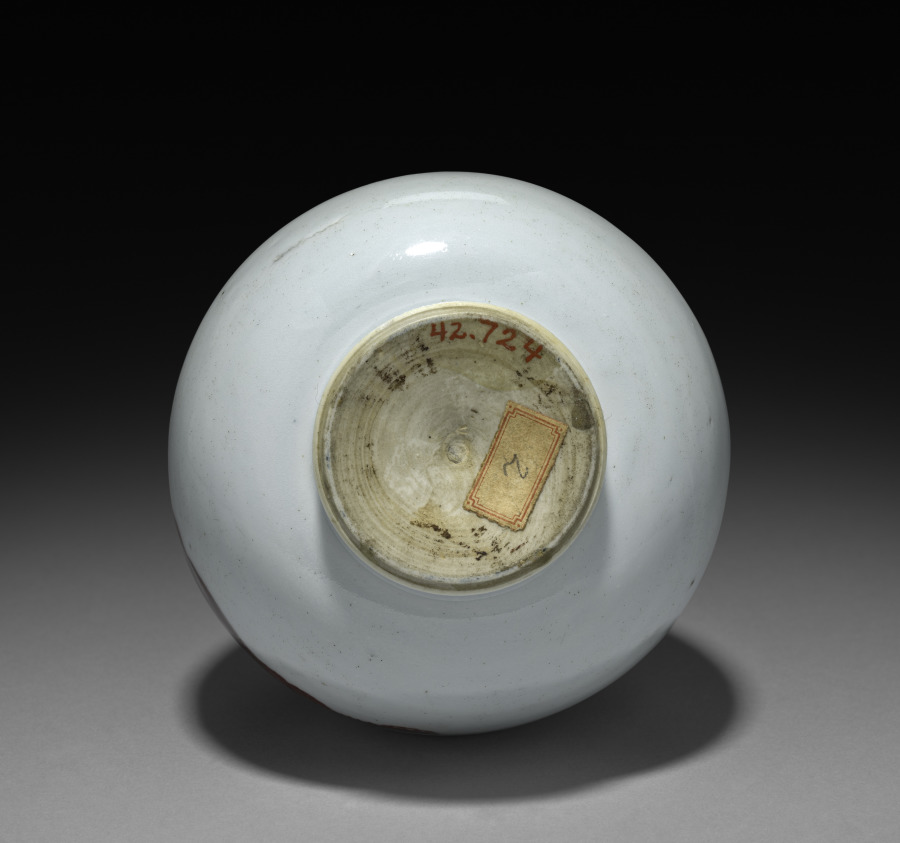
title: Bottle-shaped Vase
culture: China, Qing dynasty (1644-1911), Kangxi reign (1661-1722)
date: 1662–1722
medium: porcelain with underglaze decoration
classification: Ceramic